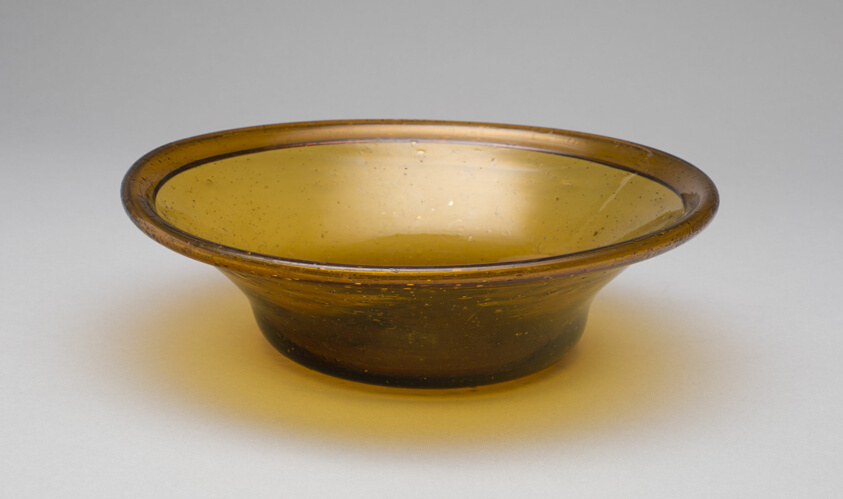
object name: Glass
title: Pan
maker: Mantua Glass Works (Manutua, Ohio, 1821–1829)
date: c. 1825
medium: Blown glass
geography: Mantua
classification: container; glass; american decorative arts; american arts; decorative arts